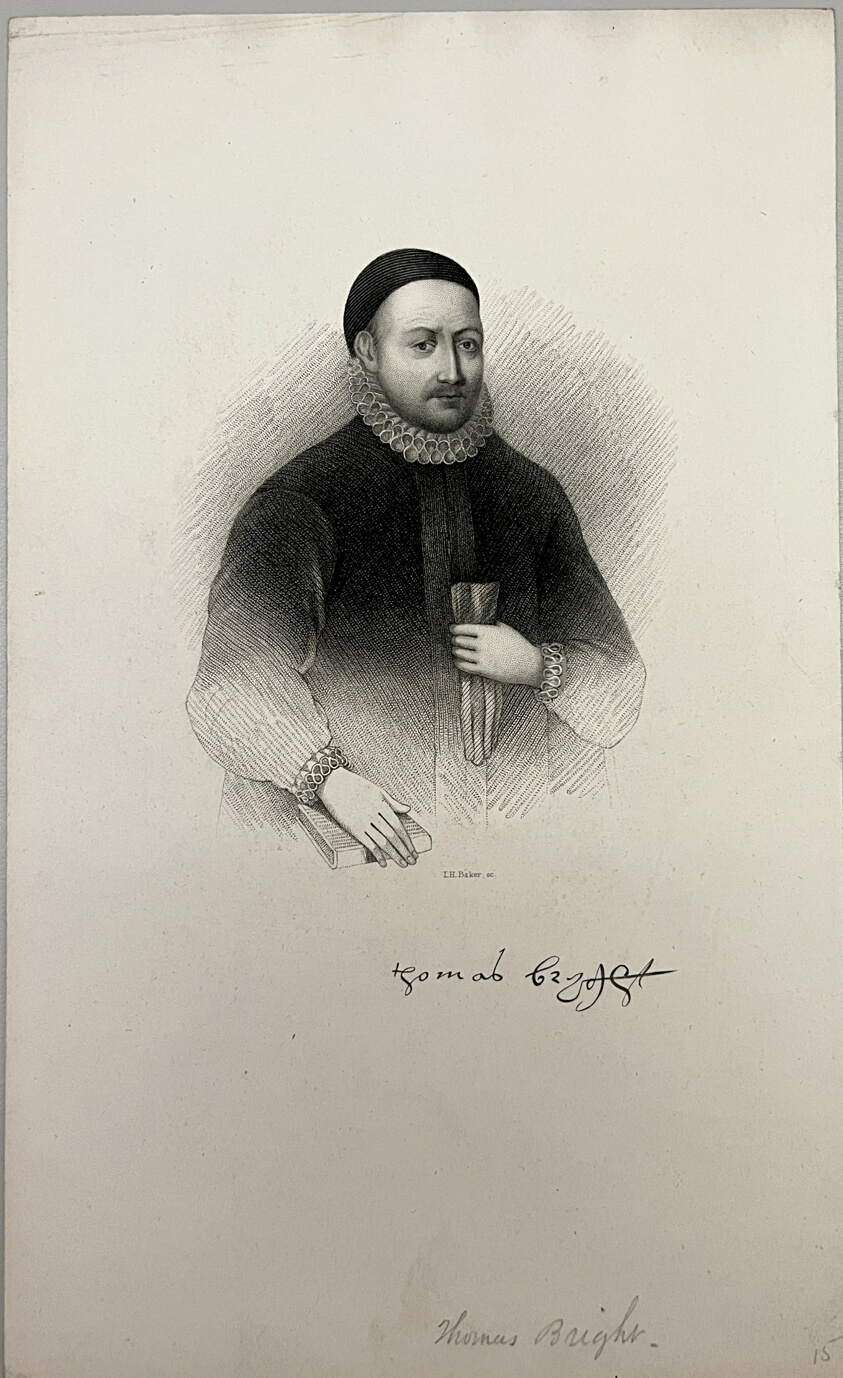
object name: Print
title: Thomas Bright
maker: I.H. Baker (likely British, 19th century); after Artist Unknown (British, 16th century)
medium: Stipple engraving on paper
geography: United States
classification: reproduction; print; prints and drawing